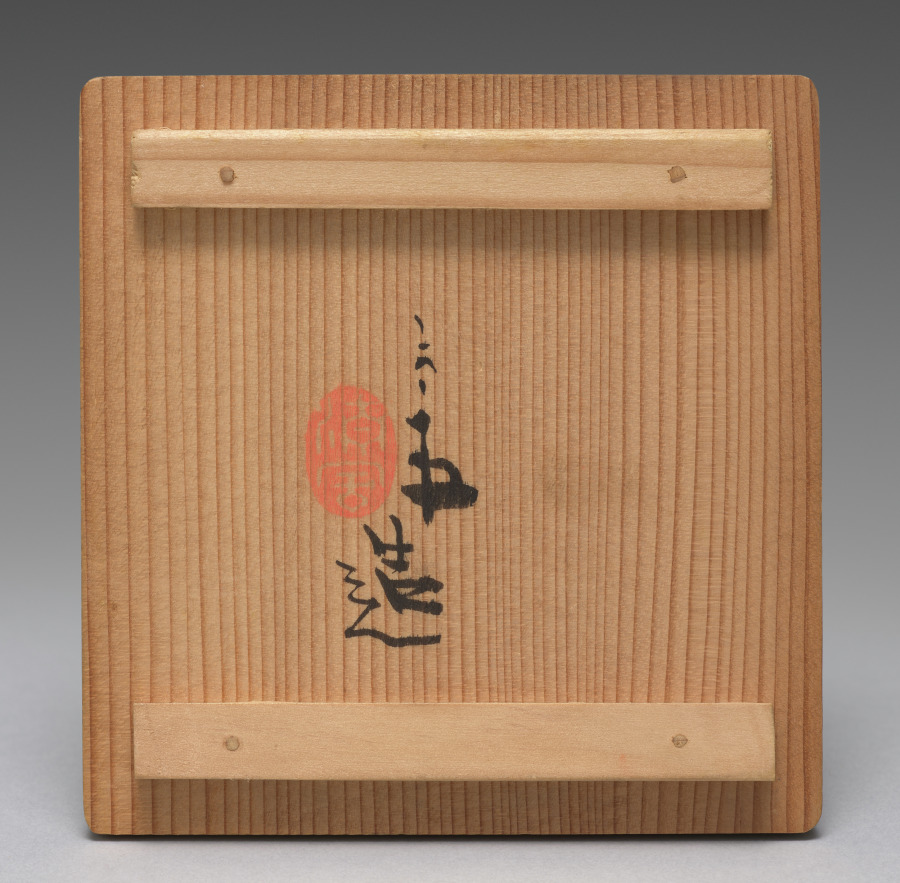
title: Teabowls with Peony and Crabapple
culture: Japan, Meiji period (1868–1912)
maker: Seifū Yohei III (Japanese, 1851–1914)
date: 1893–1914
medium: Set of five teabowls; porcelain with underglaze and overglaze color enamels and gold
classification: Ceramic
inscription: 清風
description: Overglaze color enamels are generally called iro-e (literally “color picture”) in the terminology customarily used for porcelain decoration of the Edo period. This set of teabowls is a fine example of Yohei III’s skilled use of the technique, which is identified on this set’s box lid with the alternate phrasing “porcelain with color painting” (jisaiga). Distinct from the way overglaze colors were used in Kakiemon ware from Arita, his designs and applications show a consciousness of porcelain decoration of the Qing dynasty. Here, he combines Chinese models with a sensibility taken from Kyoto ware precedents, including painting with powdered gold (kinrande). The colors used in the bowls are as follows: blue, black, gold, white, light green, green, and pink. The blue appears only inside the footring, as a double band of underglaze color. The black iron, used for stems and leaf veins, is painted over the glaze. The gold, also painted over the glaze, is used for leaves and the centers of flowers, for solid, glossy lines defining detail, or as a semimatte ground. The white of the peony flower is built up to a low relief over the glaze. Yohei has incised lines of varying widths into the pigment, carving away to the bowl’s surface, to differentiate individual petals and their rippled shapes. The light and dark greens, as well as the pink, are painted over the glaze. Of note is how Yohei has first used thinly applied lines of light green to draw the plum branch before applying the opaque iron black. For the plum buds and flowers, he has used a diluted pink with an opaque pink for outline, both over the glaze. In his later works, Yohei used pink both over and under the glaze in a manner similar to underglaze blue, and it can be challenging in some cases to discern which technique he has used. A lidded container in a private collection has a similar design but is augmented with the inclusion of white and purple magnolia blossoms. In contemplating the original decorative program of a set, of which these teabowls may have been a part, it is worth considering that perhaps not all objects included the full range of motifs. In such cases, the composition of the individual object may be best understood within the context of the extended ensemble. Here, the delicate pink plum on one side of the bowl seems slightly unbalanced with the bold white peony on the other, but when seen with other objects with the magnolia and its additional colors and shapes, it is possible to imagine a set with a complex, balanced design across multiple pieces.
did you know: These five teabowls were likely from a larger set of teaware.